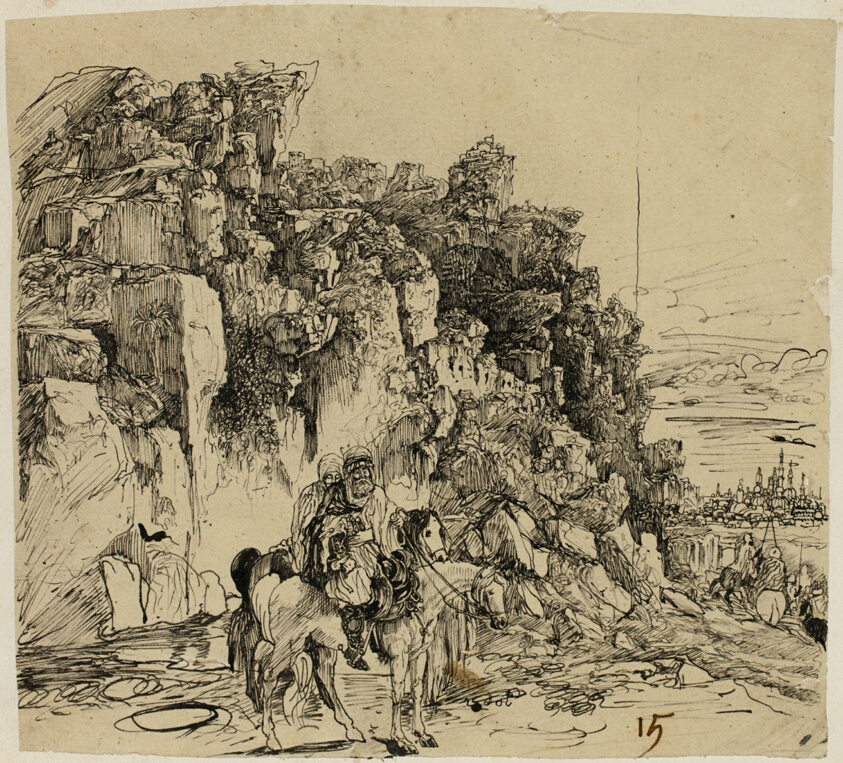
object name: Drawing and Watercolor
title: Mountainous Landscape with Horsemen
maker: Rodolphe Bresdin (French, 1825–1885)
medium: Pen and black ink on tan tracing paper, laid down on ivory wove paper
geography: France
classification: prints and drawing; drawings (visual works)